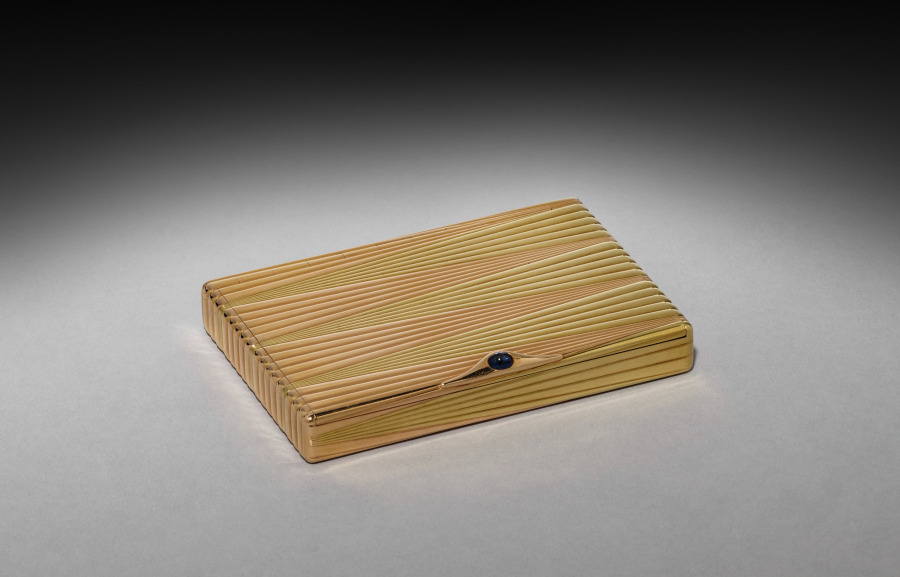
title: Cigarette Case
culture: Russia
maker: House of Fabergé (Russian, 1842–1918)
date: c. 1908–17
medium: gold, sapphire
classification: Silver